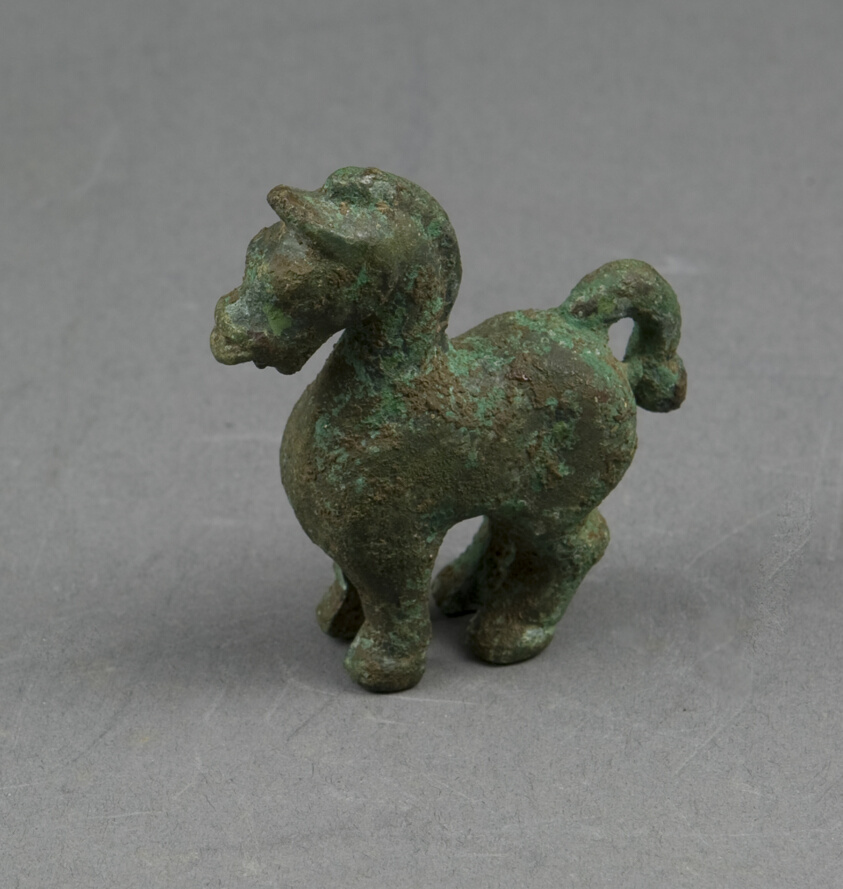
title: Standing Horse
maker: China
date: Han dynasty (206 BC–220 BCE)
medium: Bronze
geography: China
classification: bronze; metal; decorative object/ornament; asian art